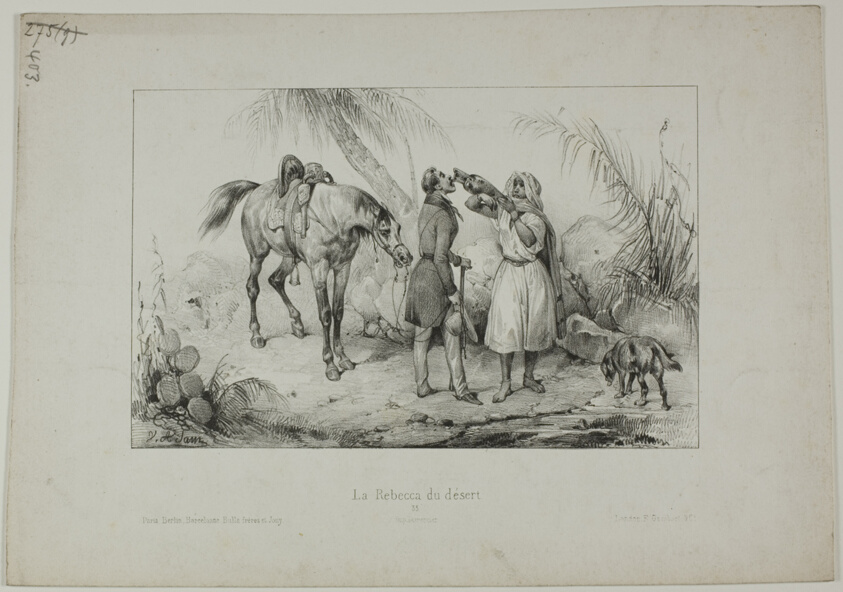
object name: Print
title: Rebecca of the Desert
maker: Victor Adam; French, 1801-1866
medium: Lithograph in black on cream wove paper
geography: France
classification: lithograph; print; prints and drawing